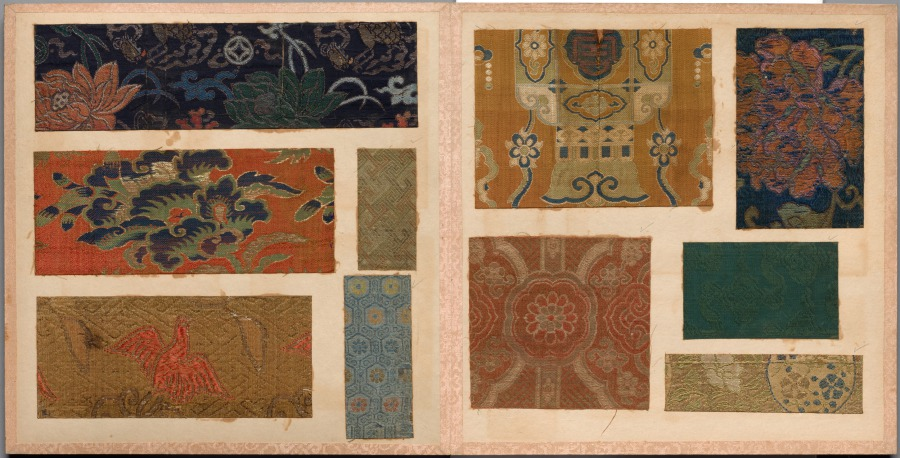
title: Album of Textile Samples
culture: Japan and China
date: 1700s–1800s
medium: silk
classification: Textile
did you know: This album has 26 pages containing 128 mounted Chinese or Japanese textile samples.